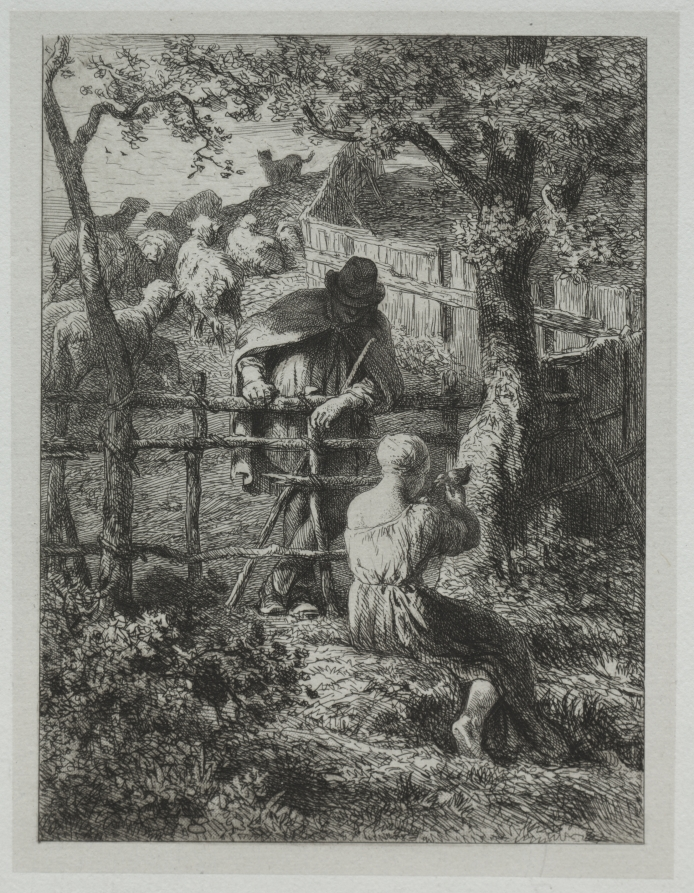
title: Summer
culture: France, 19th century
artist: Charles-Émile Jacque (French, 1813–1894)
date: 1864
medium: etching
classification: Print